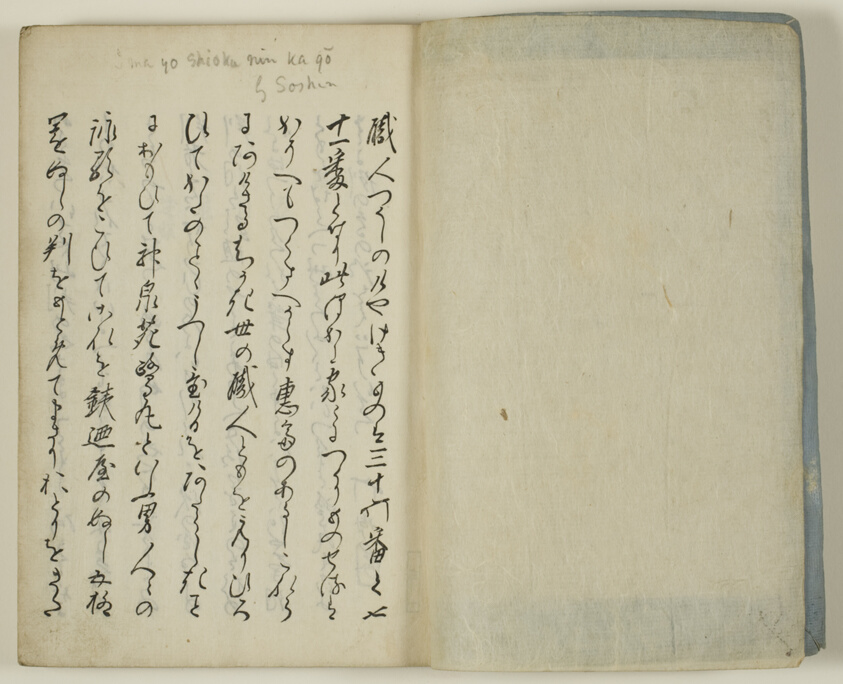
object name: Book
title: Imayo shokunin zukushi uta awase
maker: Kitao Masayoshi (Japanese, 1764–1824)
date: Unkown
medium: Woodblock printed book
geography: Japan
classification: book; asian art